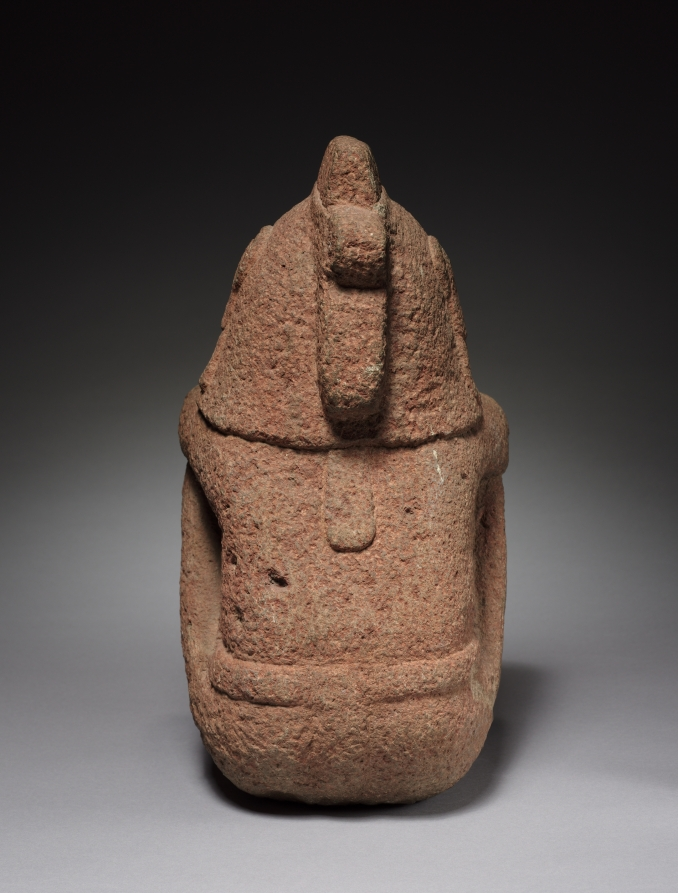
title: Seated Deity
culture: Mexico, Aztec, Valley of Mexico near Teotihuacan, Macuilxochitl (?), 14th-16th century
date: 1350–1519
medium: gray volcanic stone with red pigment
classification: Sculpture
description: The crested headdress with tassels suggests that this youthful, seated male is Macuilxochitl (Five Flower), an Aztec supernatural patron of many forms of pleasure, among them music, dance, feasting, games, and sex. His cult was popular among common people, and this effigy probably was created for use in a small neighborhood temple. The stone surface could have been plastered and then brightly painted.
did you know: The Aztecs associated the number 5 with excess: there were five gods of pleasure, one named “Five Flower.”